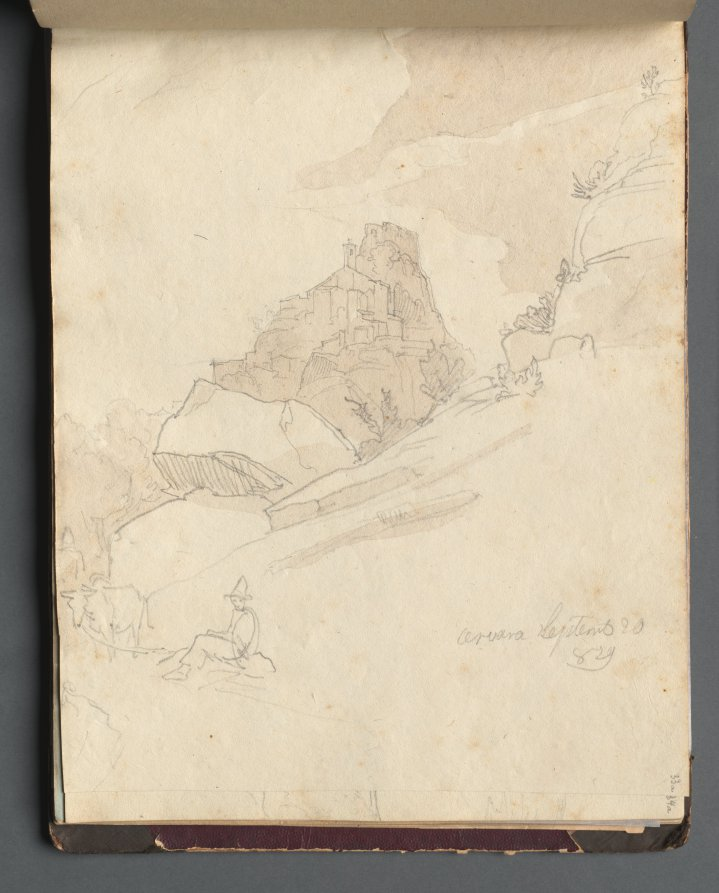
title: Album with Views of Rome and Surroundings, Landscape Studies, page 33a: "Cervera"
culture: Germany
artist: Franz Johann Heinrich Nadorp (German, 1794–1876)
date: c. 1830s-70s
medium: graphite on brown paper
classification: Bound Volume